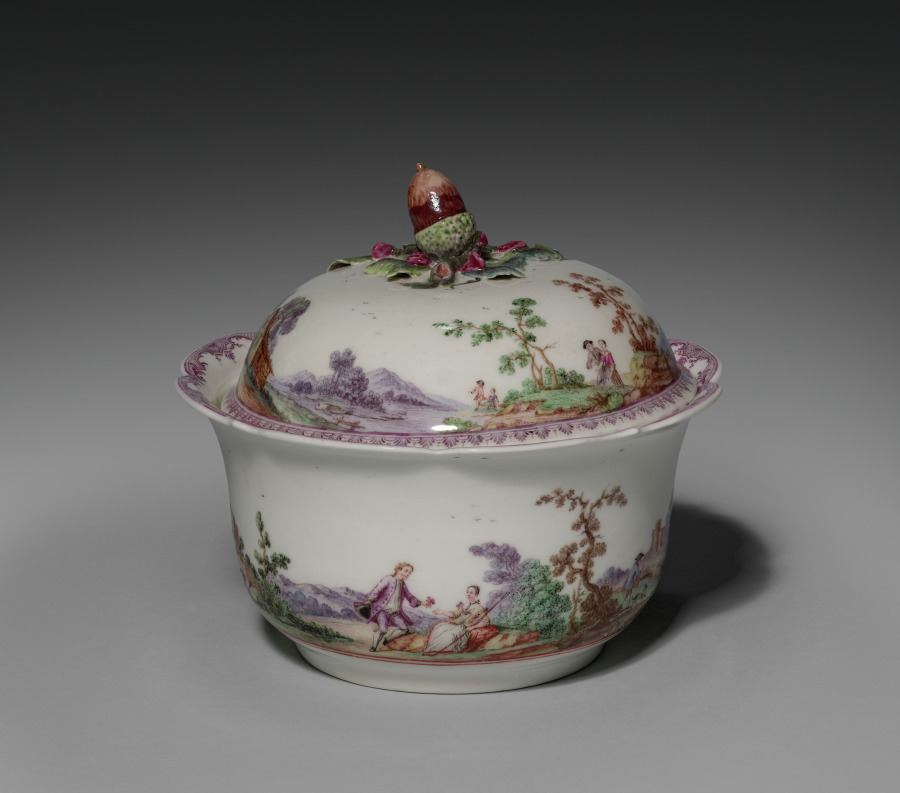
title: Covered Sugar Bowl (Pot à sucre)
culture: France, Vincennes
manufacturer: Vincennes Porcelain Manufactory (French, 1740–1756)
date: 1745–48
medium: soft-paste porcelain with enamel decoration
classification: Ceramic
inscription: In red on bottom of bowl: P.M. In red on interior of lid: P.M. 16 4.8B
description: This covered bowl, likely intended for sugar, is one of the earliest surviving examples of Vincennes porcelain, a reputed French factory moved to Sèvres in 1756. The continuous landscape is painted on this object en pointillé, a method by which a painter forms images with tiny dots. This style may have been influenced by their German competitors at the Meissen Porcelain Factory.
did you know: Three separate shades of purple, one of the most expensive colors to produce on porcelain during this time, are used extensively in this object’s paintings.